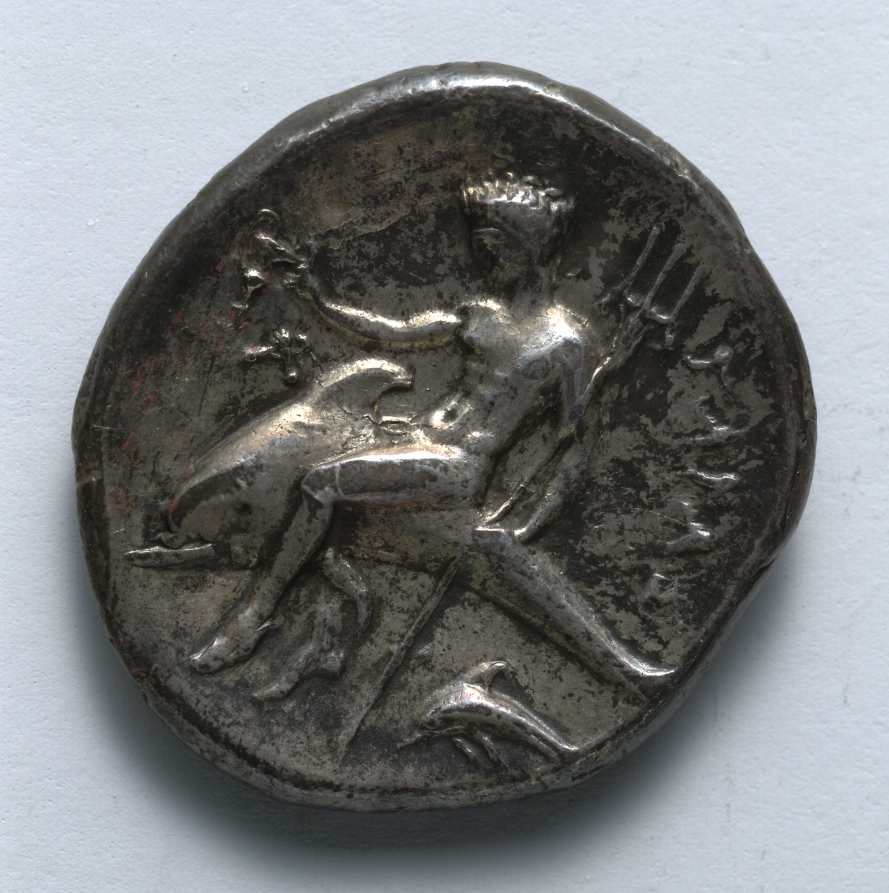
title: Stater: Taras (reverse)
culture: Greek, minted at Taras (South Italy)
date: 334–302 BCE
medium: silver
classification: Coins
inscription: ΤΑΡΑΣ